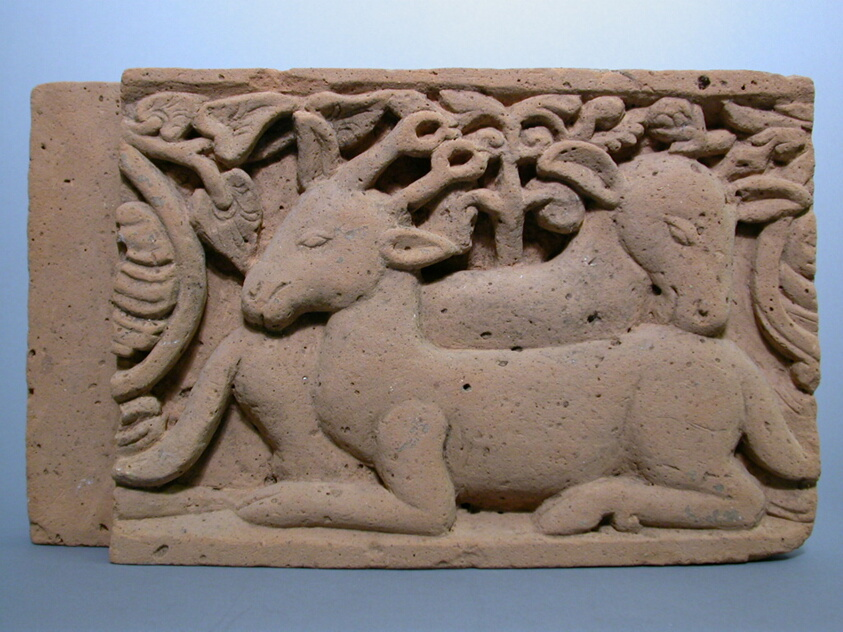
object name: Architectural fragment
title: Architectural Panel with Deer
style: Southeast Asian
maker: Indonesia; Eastern Java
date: 14th/15th century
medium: Terracotta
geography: Eastern Java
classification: earthenware; ceramics; asian art; architectural fragment